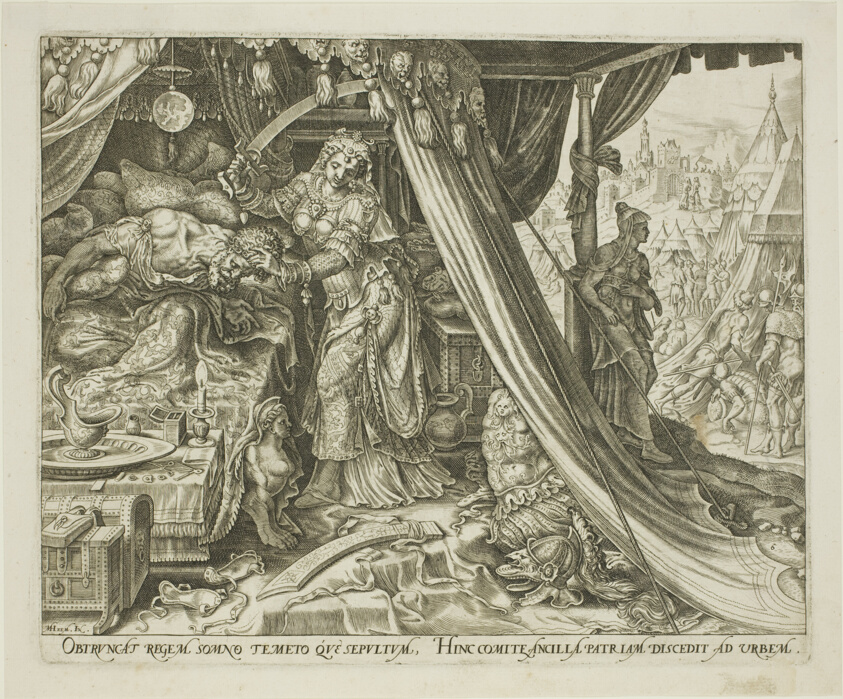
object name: Print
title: Judith Slaying Holofernes, plate six from The Story of Judith and Holofernes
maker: Philip Galle (Netherlandish, 1537-1612); after Maarten van Heemskerck (Dutch, 1498-1574)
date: 1564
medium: Engraving in black on ivory laid paper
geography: Netherlands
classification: engraving; paper; print; prints and drawing